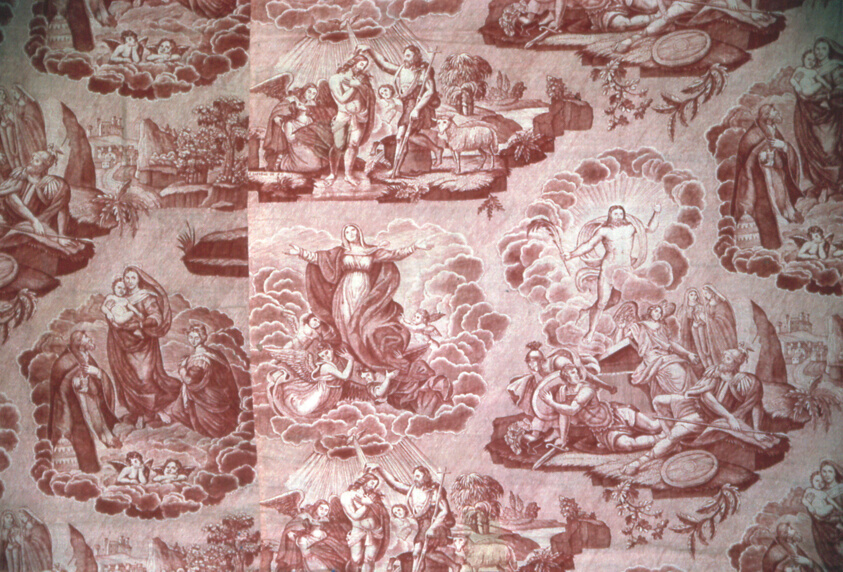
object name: Textile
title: The Resurrection (Furnishing Fabric)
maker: Designed by Alexandre Buquet (French, 1802–1865); France, Rouen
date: c. 1830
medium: Cotton, plain weave; roller printed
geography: Rouen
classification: textile; weaving - printed; furnishing textile